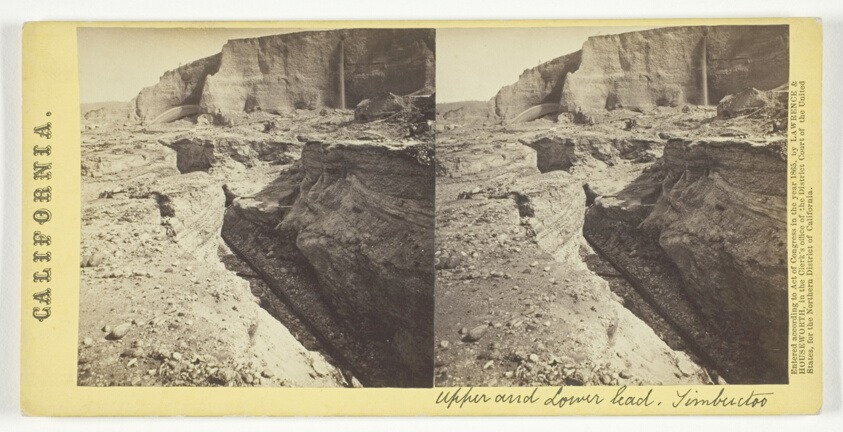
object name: Photograph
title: Upper and Lower lead, Timbuctoo, California, from the series "California"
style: 19th century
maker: Lawrence & Houseworth; American, active 1860s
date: 1865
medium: Albumen print, stereo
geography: United States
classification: stereograph (albumen); albumen silver print; photographic process; photography; photograph